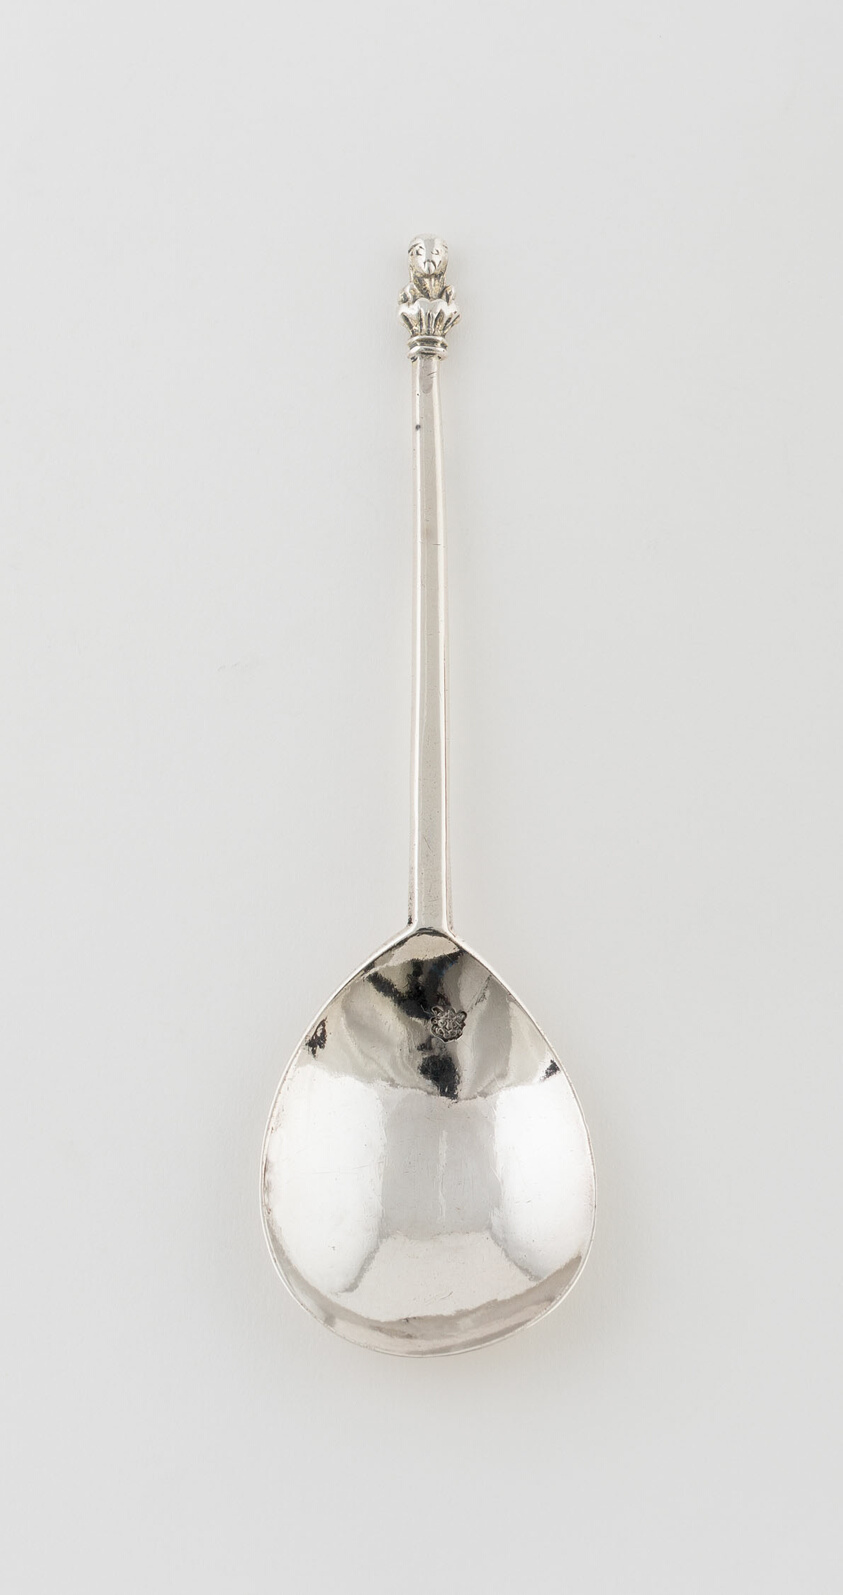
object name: Metalwork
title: Spoon with Figure of Venus and Apple of Discord Finial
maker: London, England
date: 1701/02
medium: Silver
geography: London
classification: silver; metalwork; european decorative arts